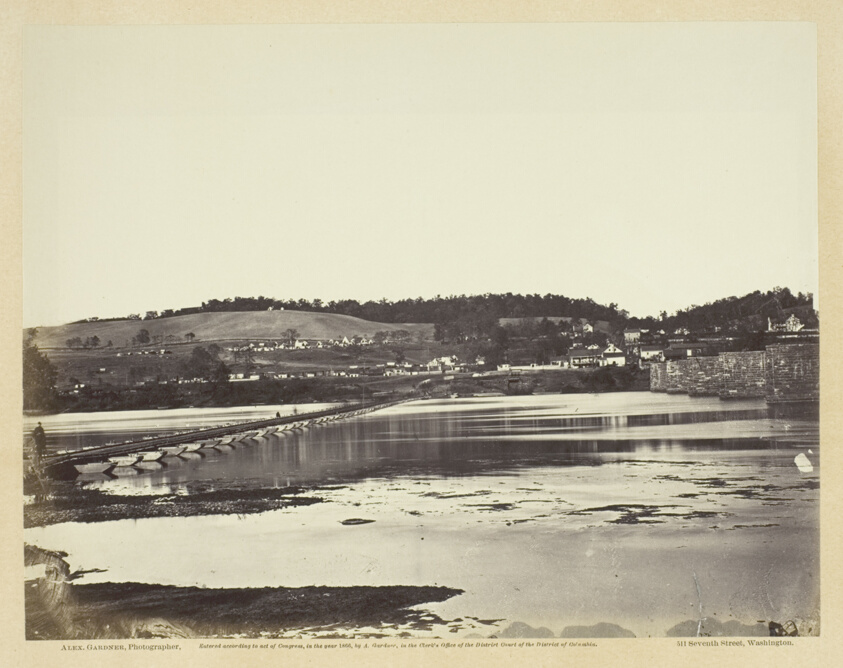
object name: Photograph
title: Pontoon Bridge Across the Potomac, at Berlin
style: 19th century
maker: Alexander Gardner (American, born Scotland, 1821–1882)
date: November 1862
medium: Albumen print, pl. 25 from the album "Gardner's Photographic Sketch Book of the War, vol. 1" (1866)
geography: United States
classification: photograph; albumen silver print; photography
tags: Collected by Hugh Edwards, Gardner's Photographic Sketch Book